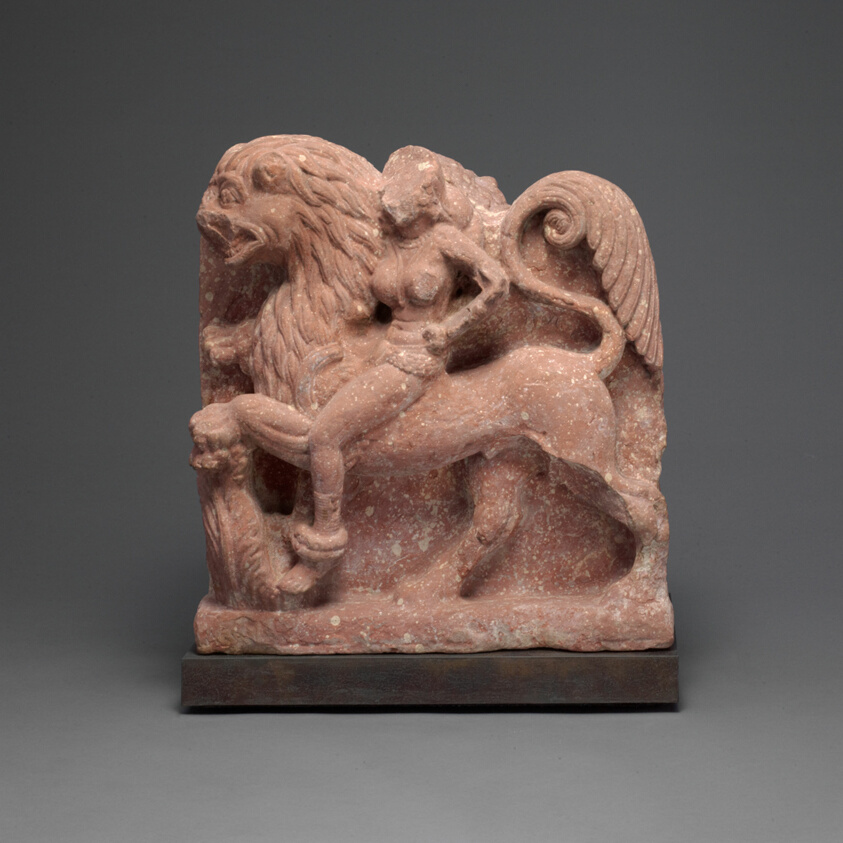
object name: Architectural fragment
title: Double -Sided Capital with Female Figure Astride a Lion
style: South Asian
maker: India; Uttar Pradesh, Mathura region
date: c. 1st century A.D.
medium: Mottled red sandstone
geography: Mathura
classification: sandstone; stone; sculpture; asian art; architectural fragment